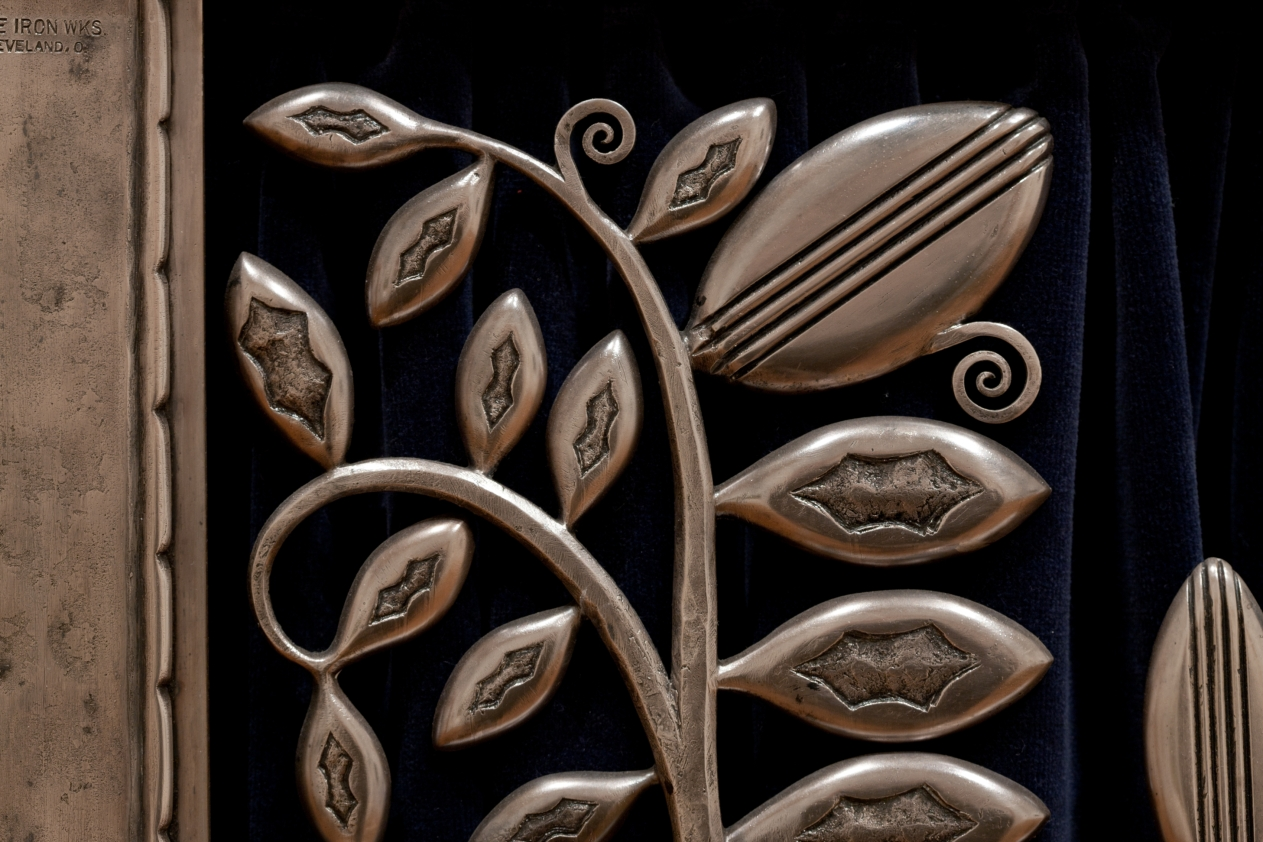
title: Muse with Violin Screen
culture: America, Ohio, Cleveland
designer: Paul Fehér (American, born Hungary, 1898–1990)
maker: Rose Iron Works (America, Ohio, Cleveland, est. 1904)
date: 1930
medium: Steel, brass; silver and gold plating, cotton velveteen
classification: Metalwork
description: Since the early years of the 20th century, the Rose Iron Works, a Cleveland supplier of architectural ornament, has produced distinguished metalwork. The company’s founder, Martin Rose, was born in Austria-Hungary and studied ornamental metalsmithing in Vienna prior to immigrating to Cleveland in 1902. In the 1920s, he hired a talented young Parisian designer, Paul Fehér, to work for the firm. Fehér’s designs, culminating in this massive screen, brought a modern European sensibility to the Rose Iron Works production. With its geometric patterning, highly stylized and abstracted natural forms, and the central figure reminiscent of the celebrated jazz singer Josephine Baker, this screen reflects the classic motifs of Art Deco design.